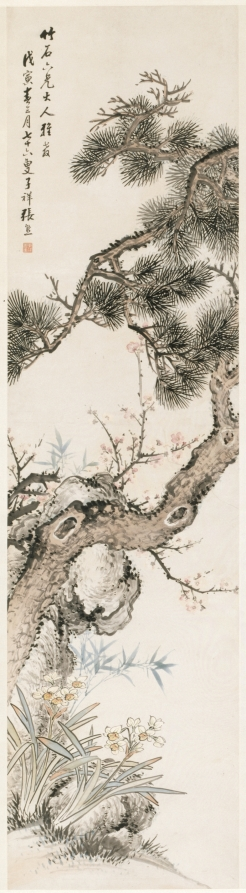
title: Three Purities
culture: China, Xiaxing, Qing dynasty (1644-1911)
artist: Zhang Xiong (Chinese, 1803–1886)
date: 1800s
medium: hanging scroll, ink and color on paper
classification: Painting